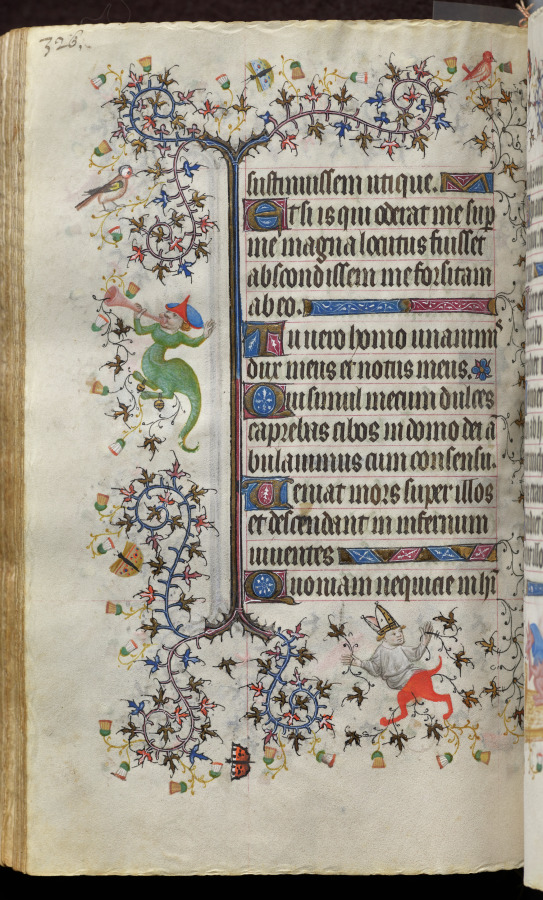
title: Hours of Charles the Noble, King of Navarre (1361-1425): fol. 163v, Text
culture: France, Paris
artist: Master of the Brussels Initials and Associates (French)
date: c. 1405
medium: ink, tempera, and gold on vellum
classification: Bound Volume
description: This precious volume was obviously highly prized by its owner, the French-born King of Navarre, who had his coat of arms painted on no less than twenty folios. Rather than directly commissioning this manuscript from a specific workshop, it seems that Charles the Noble acquired his book of hours -- perhaps ready-made for the luxury market -- while on a trip to Paris in 1404-05. A collaborative effort, six painting styles are evidenced within the pages of this codex, those of two Italians, two Frenchmen, and two Netherlanders. The painter who was responsible for the planning and decoration of the book, and who produced seventeen of the large miniatures, was a Bolognese artist known as the Master of the Brussels Initials. His principal assistant, responsible for most of the borders, was a Florentine who signed his name "Zecho" da Firenze on folio 208 verso.